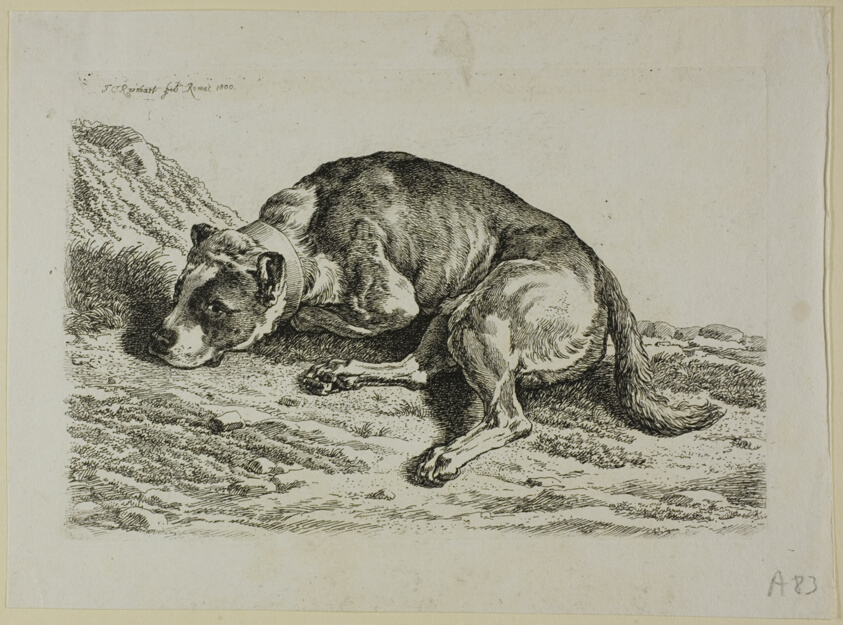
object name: Print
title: Dog Laying Down, from from Die Zweite Thierfolge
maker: Johann Christian Reinhart (German, 1761-1847)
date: 1799/1803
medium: Etching on ivory laid paper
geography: Germany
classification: etching; print; prints and drawing